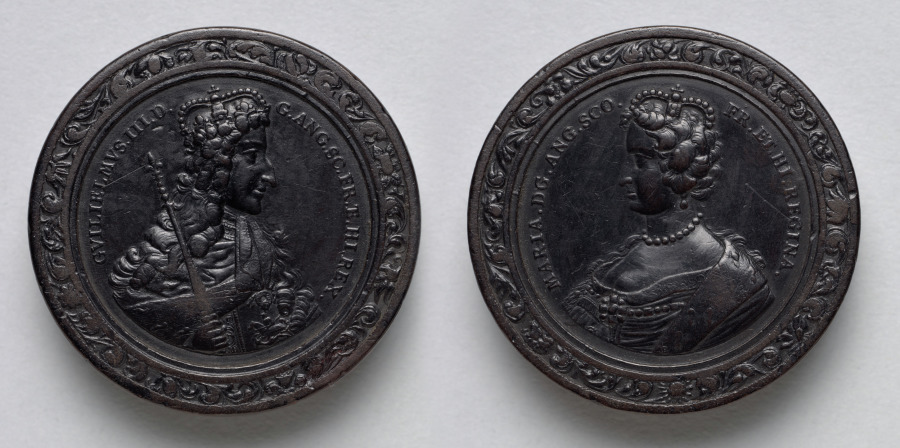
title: Gaming Piece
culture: Germany, late 17th-early 18th Century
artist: Martin Brunner (German, 1659–1725)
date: c.1700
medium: wood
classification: Furniture and woodwork